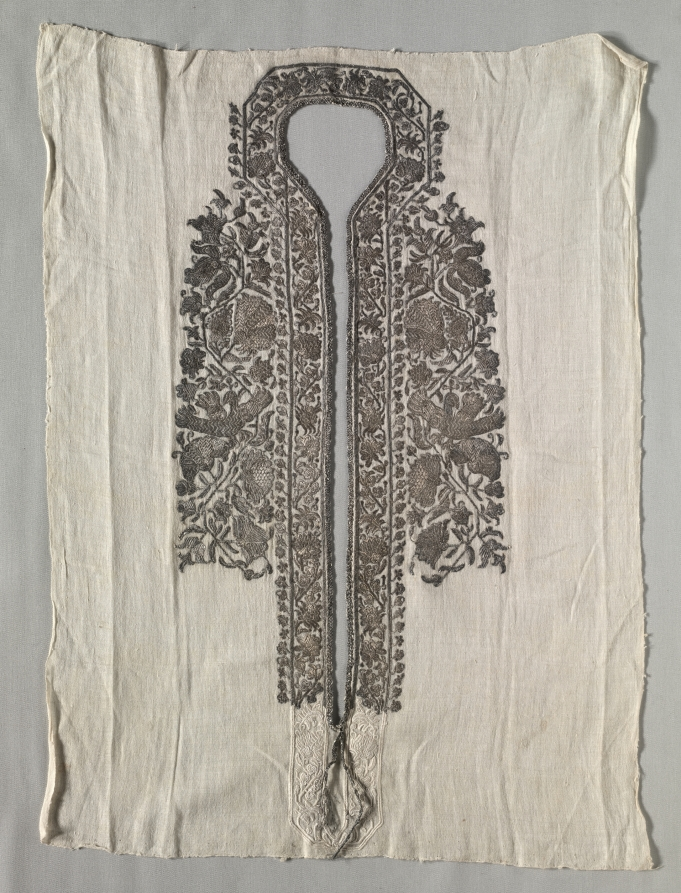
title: Fragment of a Shirt Front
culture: Turkey, 19th century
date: 19th century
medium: metal thread embroidery on cotton(?)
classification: Embroidery